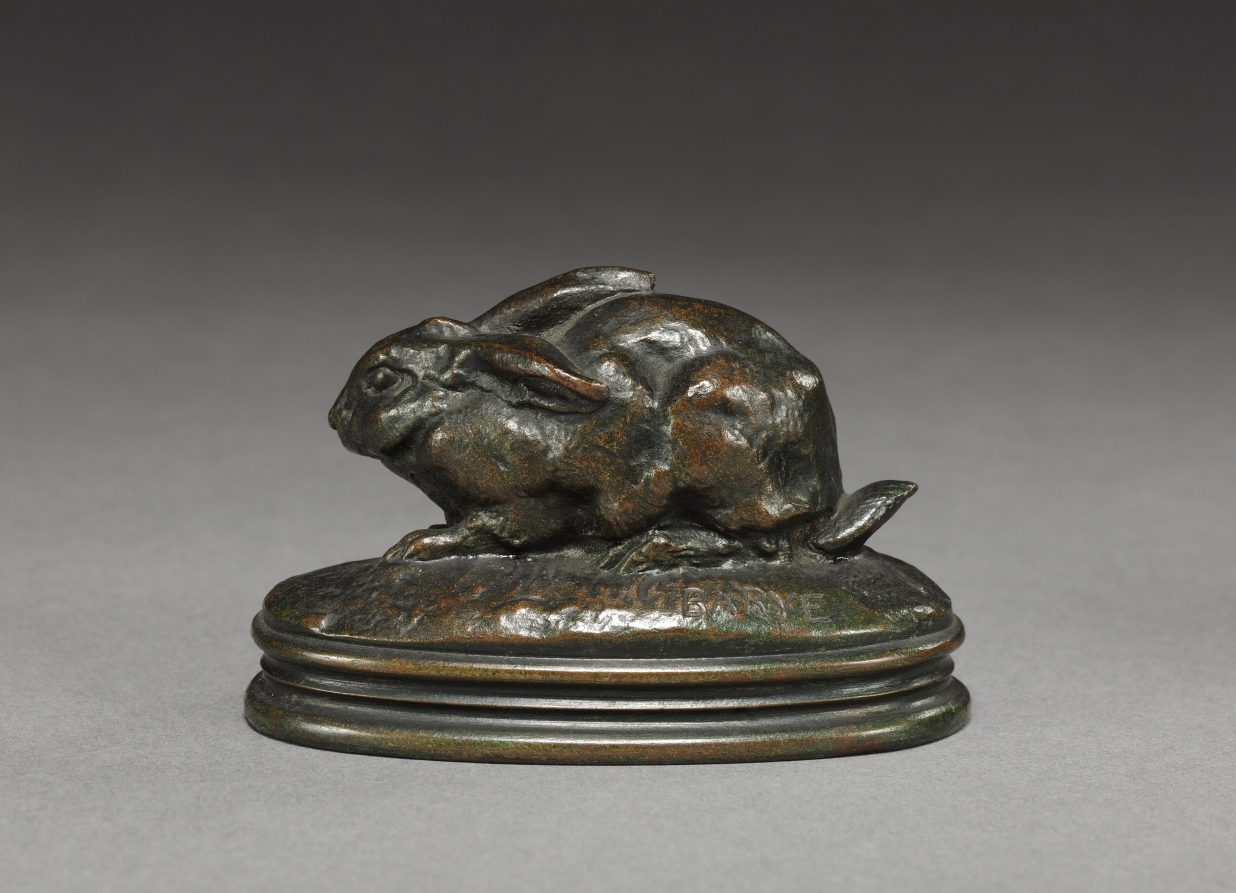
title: Hare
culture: France, 19th century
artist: Antoine-Louis Barye (French, 1796–1875)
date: c. 1830 – 1875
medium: bronze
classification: Sculpture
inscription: Signed on base top rear: "Barye"